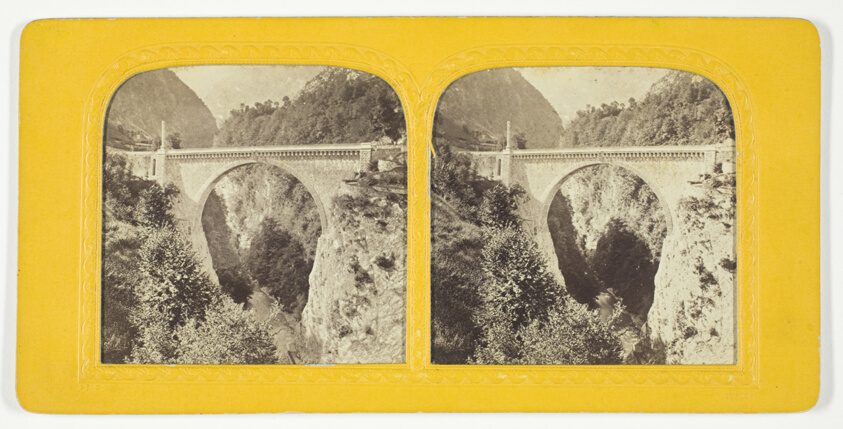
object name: Photograph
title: Napoleon Bridge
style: 19th century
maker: Artist unknown; French, late 19th century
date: 1875/99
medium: Albumen print, stereo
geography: France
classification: photography; photograph